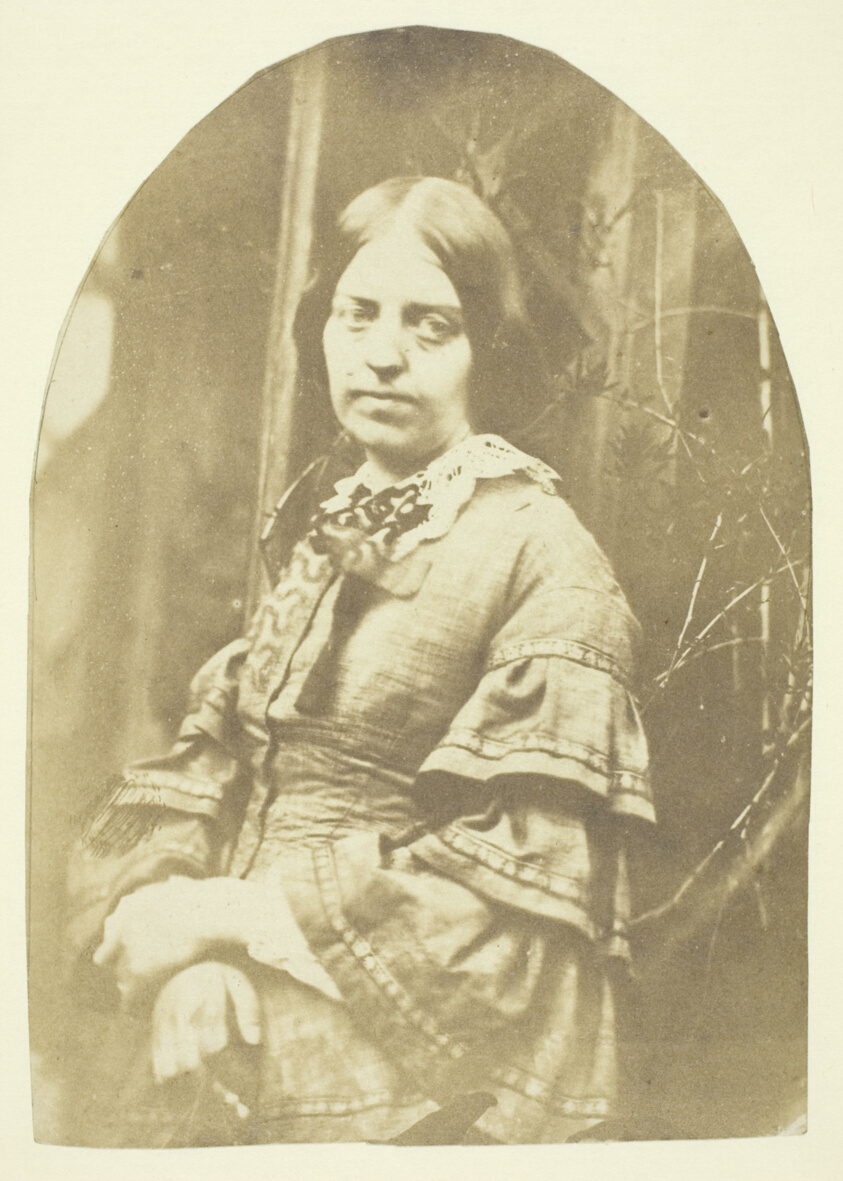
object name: Photograph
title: Mrs. Craik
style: 19th century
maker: Artist unknown, possibly Benjamin Mulock (English, 1829–1863); English, 19th century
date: 1850/65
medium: Calotype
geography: England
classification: salted paper print; photographic process; photography; photograph